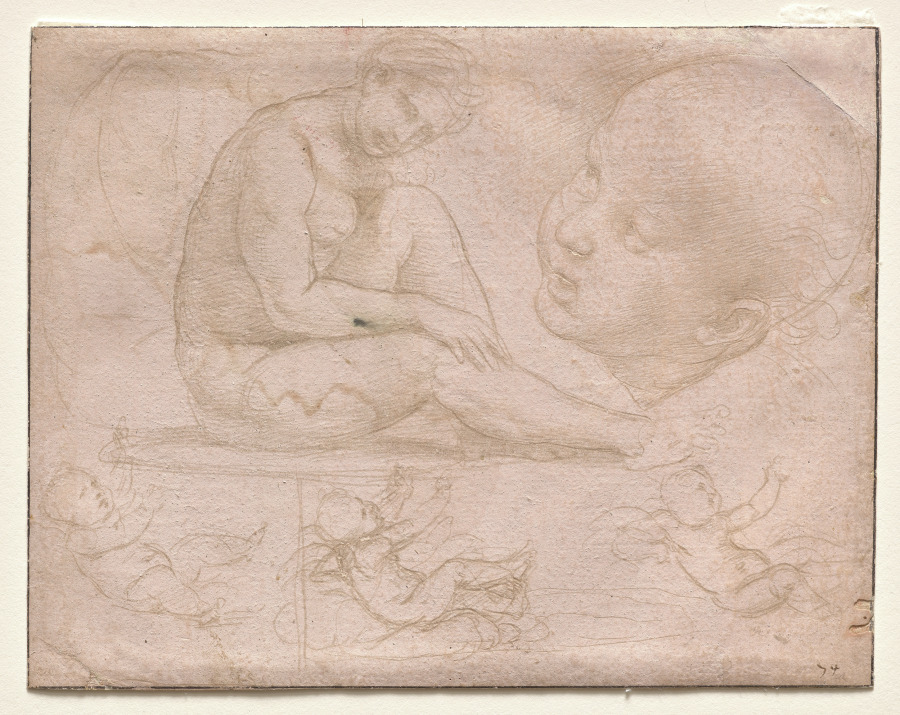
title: Studies of a Seated Female, Child's Head, and Three Studies of a Baby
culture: Italy, 16th century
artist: Raphael (Italian, 1483–1520)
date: c. 1507–8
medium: metalpoint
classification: Drawing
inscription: lower right, in brown ink: 74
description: This drawing is from Raphael’s "pink sketchbook," comprised of ten sheets of roughly equal size that each portray variations of a mother and child. Today, six of the drawings at the Palais des Beaux-Arts, Lille; two are at the British Museum; one is in a private collection; and one is in Cleveland. The small format of the sheets would have enabled the artist to carry the notebook as he traveled from Florence to Rome in 1508. Raphael used metalpoint, a technique popular in 15th- and early 16th-century Italy on a pink prepared surface. The pose of the infant's head in the drawing was based on that of the Christ child in Leonardo da Vinci's Benois Madonna, then in a private collection in Florence, with changes—such as the uplifted eyes and open mouth—made by Raphael. The curving back of the female nude is echoed in the roundness of the child's head. The three sketches of a reclining infant at the bottom of the sheet are freely handled and improvisational, relaying the child's squirming, continuous movement with repeated contour lines.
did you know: This sheet was probably once part of a sketchbook carried by the artist Raphael on a 1508 journey between Florence and Rome.